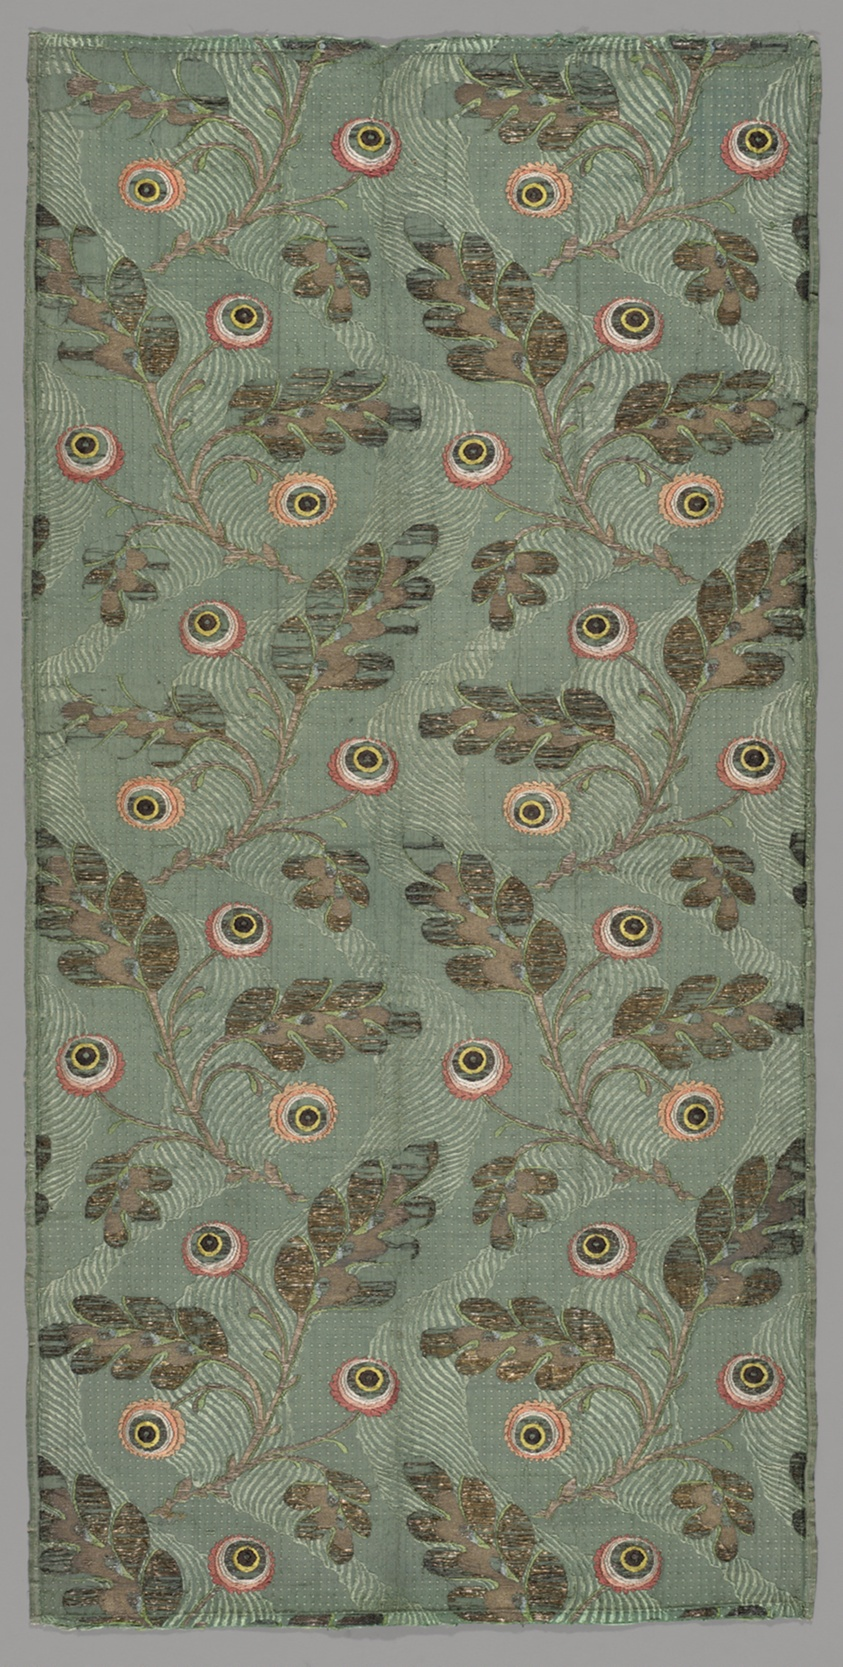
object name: Textile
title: Panel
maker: France or England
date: Early 18th century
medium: Silk, gilt-metal strip, and gilt-metal-strip-wrapped silk (filé and frisé), plain weave with supplementary patterning wefts and brocading wefts and weft-float faced interlacing of secondary binding warps and some supplementary brocading wefts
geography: France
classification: textile; weaving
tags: floral motifs, flowers